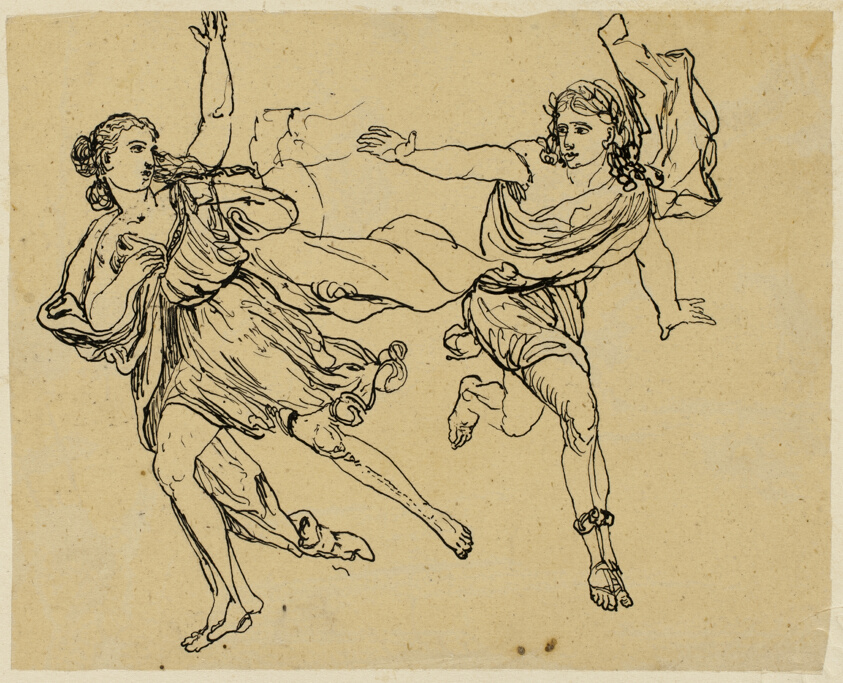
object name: Drawing and Watercolor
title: The Pursuit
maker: Rodolphe Bresdin (French, 1825-1885)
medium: Pen and black ink, on tan tracing paper, laid down on buff wove paper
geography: France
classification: pen and ink drawings; drawings (visual works); prints and drawing